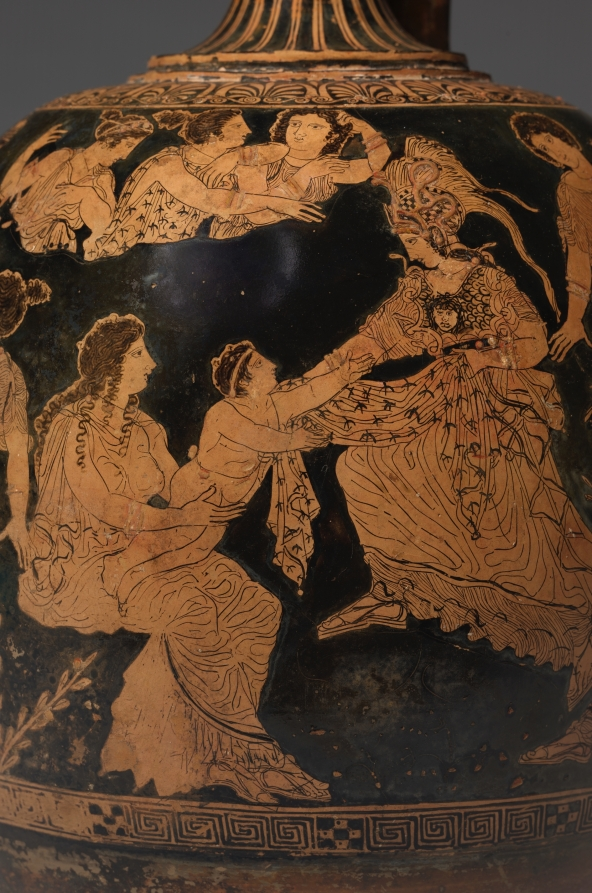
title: Red-Figure Squat Lekythos (Oil Vessel): Birth of Erichthonios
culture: Greek, Attic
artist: attributed to Meidias Painter (Greek, Attic, active c. 420–400 BCE)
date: c. 420–410 BCE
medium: ceramic, with gilding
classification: Ceramic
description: The central group on this vase shows the seated earth goddess Ge (also known as Gaia) handing her baby, Erichthonios, to Athena. Conceived from the seed of Hephaistos, Erichthonios would go on to become a king of Athens, and the story of his birth became popular in Athenian art of the fifth century BC. Other representations include Hephaistos as well as Kekrops, the mythical first king of Athens, sometimes together with Zeus and other deities. But this one includes only female onlookers—likely the three daughters of Kekrops watching from above, with Aphrodite and several abstract personifications such as Peitho (Persuasion) and Eudaimonia (Happiness) standing and seated nearby.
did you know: A lead rivet sits at the junction of handle and neck, probably an ancient repair.